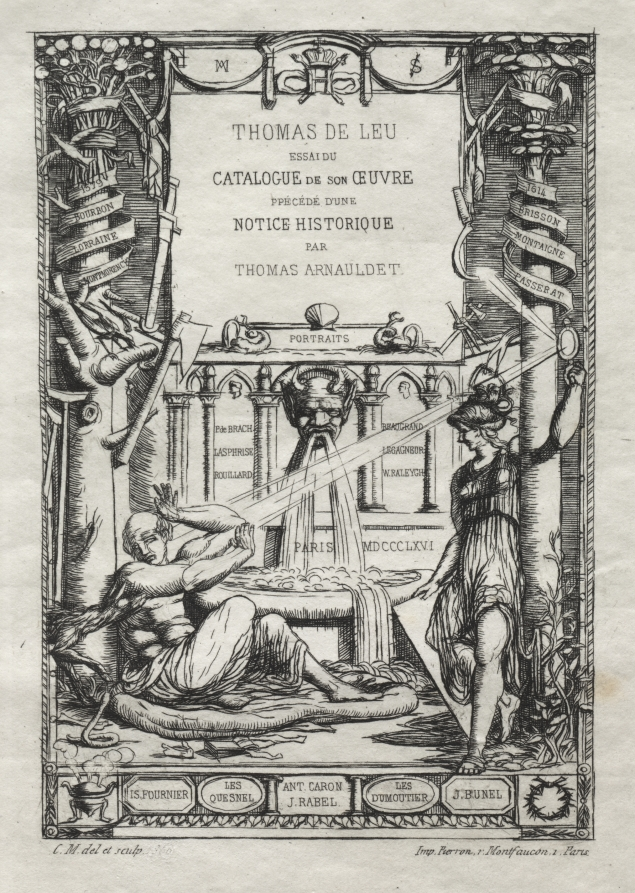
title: Frontispiece for a Catalogue of the Engravings of Thomas de Leu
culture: France, 19th century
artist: Charles Meryon (French, 1821–1868)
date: 1866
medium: etching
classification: Print